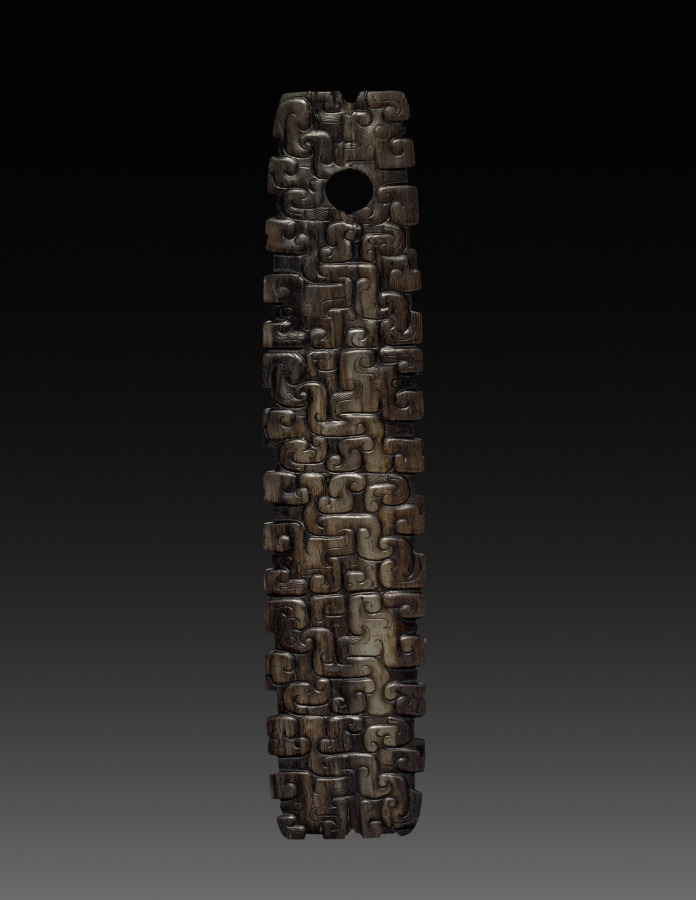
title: Jade Scepter with Interlocking Pattern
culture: China, Eastern Zhou dynasty (770–256 BCE)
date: c. 600–400 BCE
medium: nephrite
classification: Jade